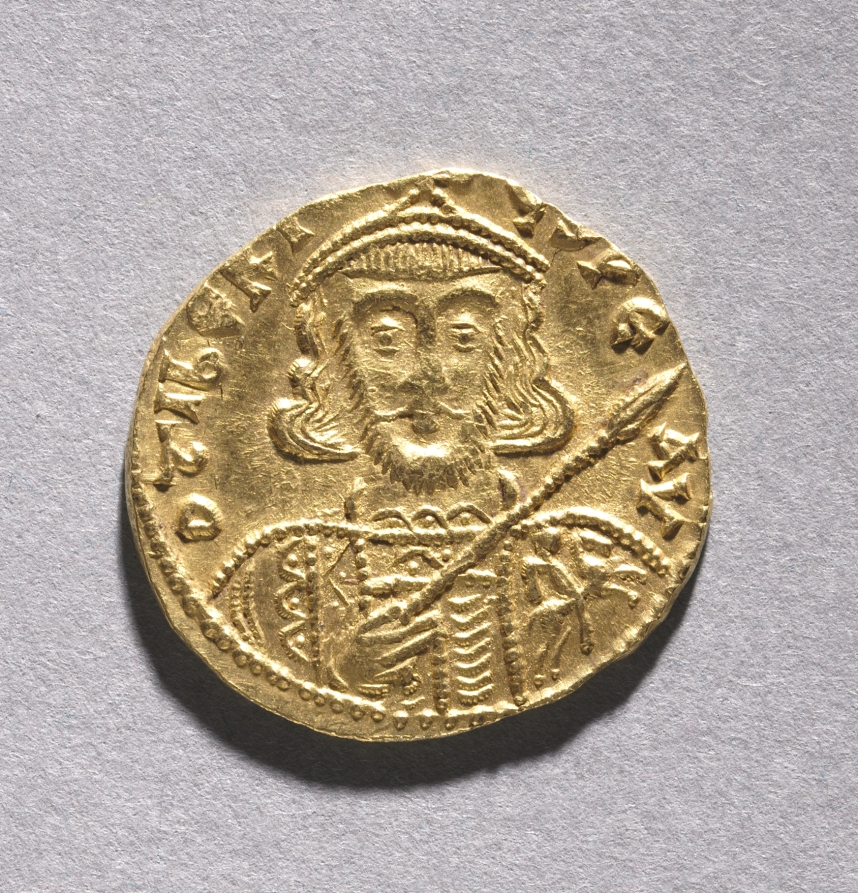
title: Solidus with Tiberius III Apsimarus (obverse)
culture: Byzantium, Constantinople, late 7th-early 8th century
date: 698–705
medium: gold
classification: Coins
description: The vast number of surviving Byzantine coins attests to the level of trade across the empire. Controlled and supervised by the emperor, the producers of coins took care to represent his authority and reflect his stature. Talented artists were recruited to engrave the dies (molds) used for the striking of coins. Emperors increasingly came to include their heirs and co-emperors on their coinage, as well as other family members or even earlier rulers. Coins were recognized, then as now, as small, portable works of art. With their inscriptions and images, Byzantine coins provide valuable documentation of historical events and a record of the physical appearance of the emperors. The coins shown here include the solidus, the basic gold coin of 24 karats; the tremissis, a gold coin of one-third the weight and value of the solidus; and the nomisma, which in the 10th century replaced the solidus as the standard gold coin.